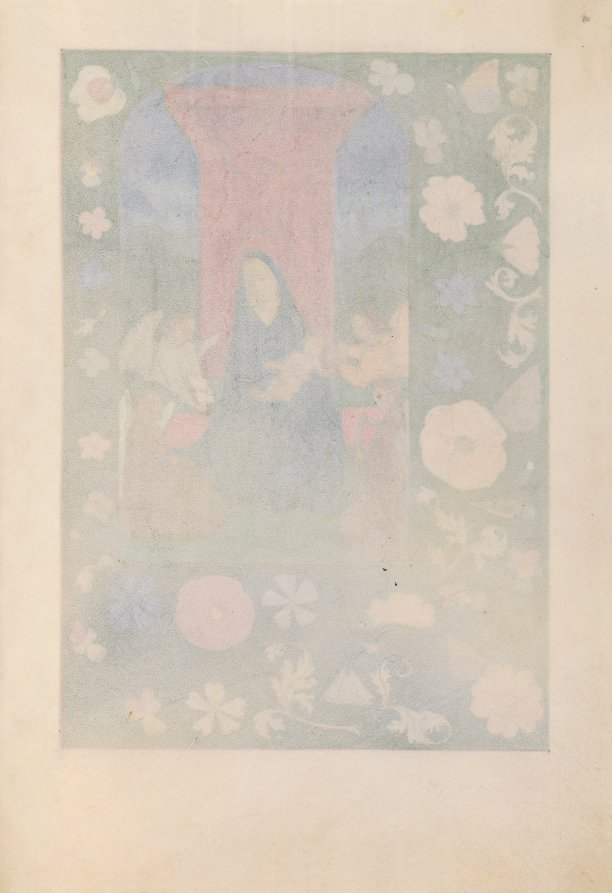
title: Hours of Queen Isabella the Catholic, Queen of Spain: Fol. 80r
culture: Flanders, Ghent and Bruges, late 15th century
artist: Master of the First Prayerbook of Maximillian (Flemish, c. 1444–1519)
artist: and Associates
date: c. 1500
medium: ink, tempera, and gold on vellum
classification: Bound Volume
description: This manuscript was illuminated by a circle of at least five highly organized manuscript painters active in the Flemish cities of Ghent and Bruges. The principal illuminator was Alexander Bening, who painted the majority of the book's miniatures. Manuscripts produced by this circle of artists are renowned for the decoration of their borders, which typically feature a rich variety of realistically-painted flowers, birds, and butterflies. This prayer book, called a book of hours, was intended not for a cleric, but for the private devotions of a lay person-in this case, Isabella the Catholic, Queen of Spain (1451-1504). Isabella's coat of arms embellishes the book's frontispiece. It is unlikely that the book was commissioned by the Queen herself; rather, she probably received it as a diplomatic gift from someone courting her patronage, perhaps Cardinal Francisco Jimenez de Cisneros. A Franciscan friar, Jimenez was dependent upon Isabella for his advancement, first to the post of Queen's confessor in 1492, and then to Archbishop of Toledo in 1495.